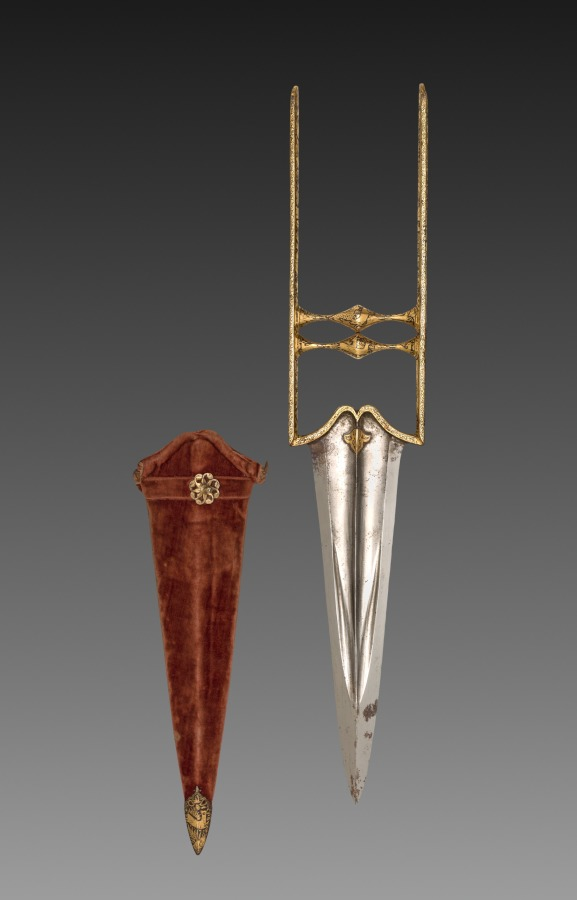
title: Katar dagger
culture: India, Mughal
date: 1700s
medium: Iron handle with gold inlay; steel blade; wooden sheath with velvet cover, brass boss, iron tip with gold inlay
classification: Arms and Armor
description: Stabbing daggers called katar were distinctive to India and often worn by soldiers and courtiers, tucked into their belts. Covering the entire handle are tiny scenes of lions and cheetahs hunting deer and buffalo in rocky wooded settings.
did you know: The ornament on the handle faces up from the perspective of a right-handed user, on all sides.